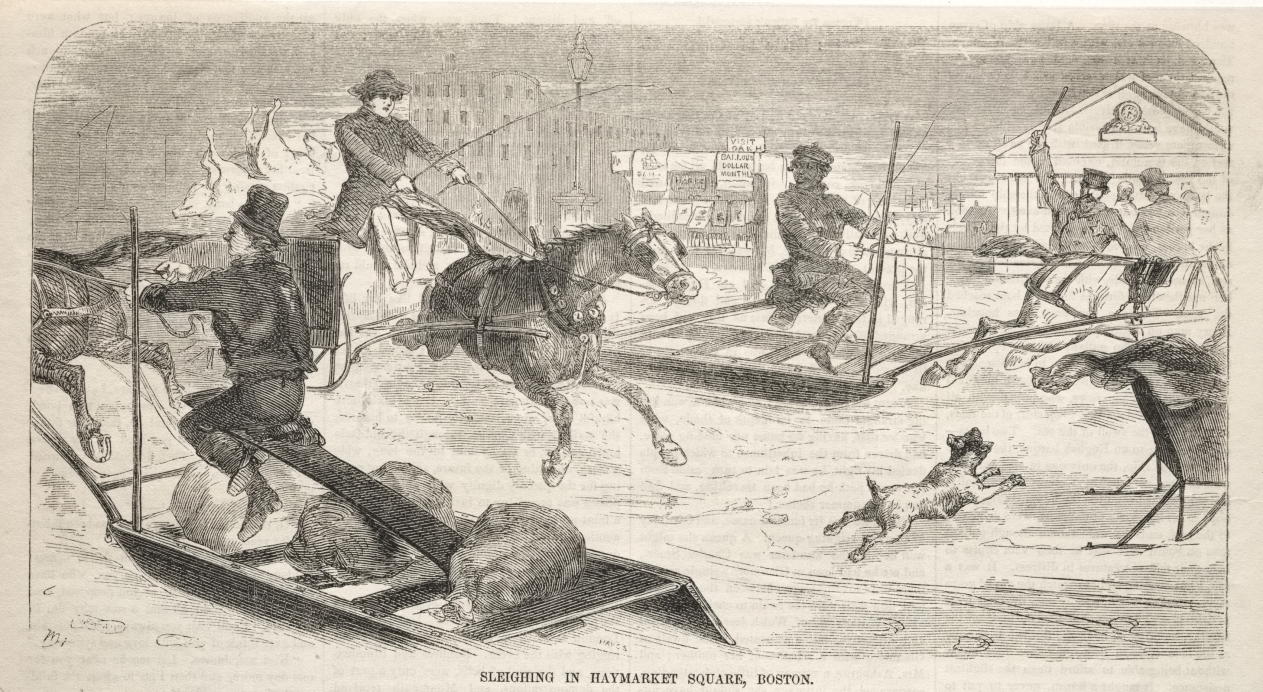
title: Sleighing in Haymarket Square, Boston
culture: America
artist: Winslow Homer (American, 1836–1910)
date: 1859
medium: wood engraving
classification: Print